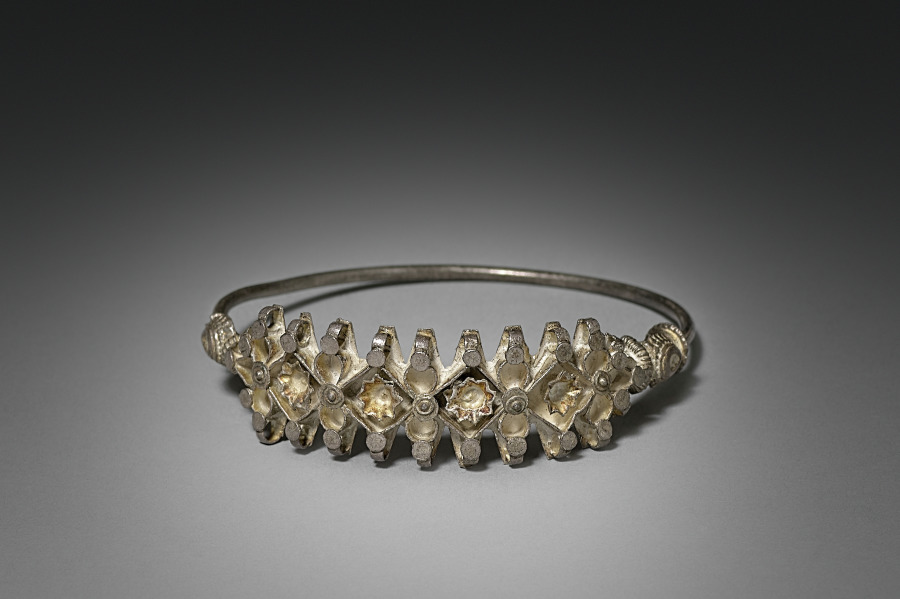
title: Nose Ring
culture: India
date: early 1900s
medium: silver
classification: Jewelry